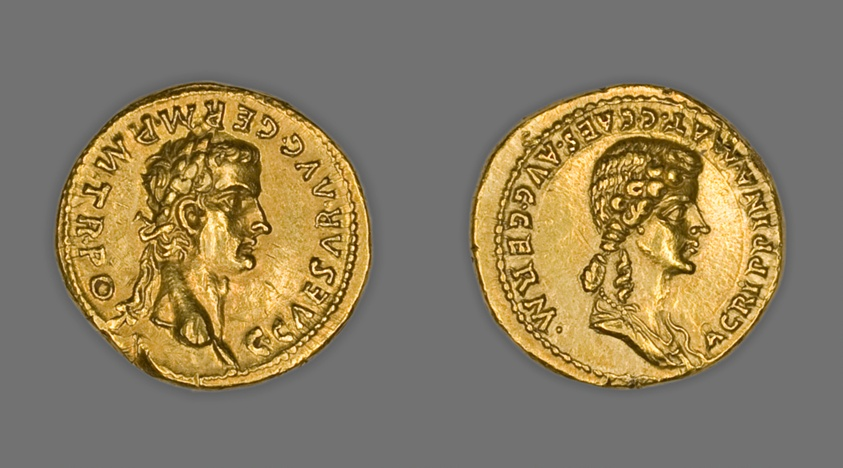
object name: Coin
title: Aureus (Coin) Portraying Emperor Caligula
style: imperial (roman), ancient, roman (ancient, style or period)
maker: Roman; minted in Rome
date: 37-38, issued by Caligula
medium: Gold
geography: Rome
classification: coin; ancient art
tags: portraits